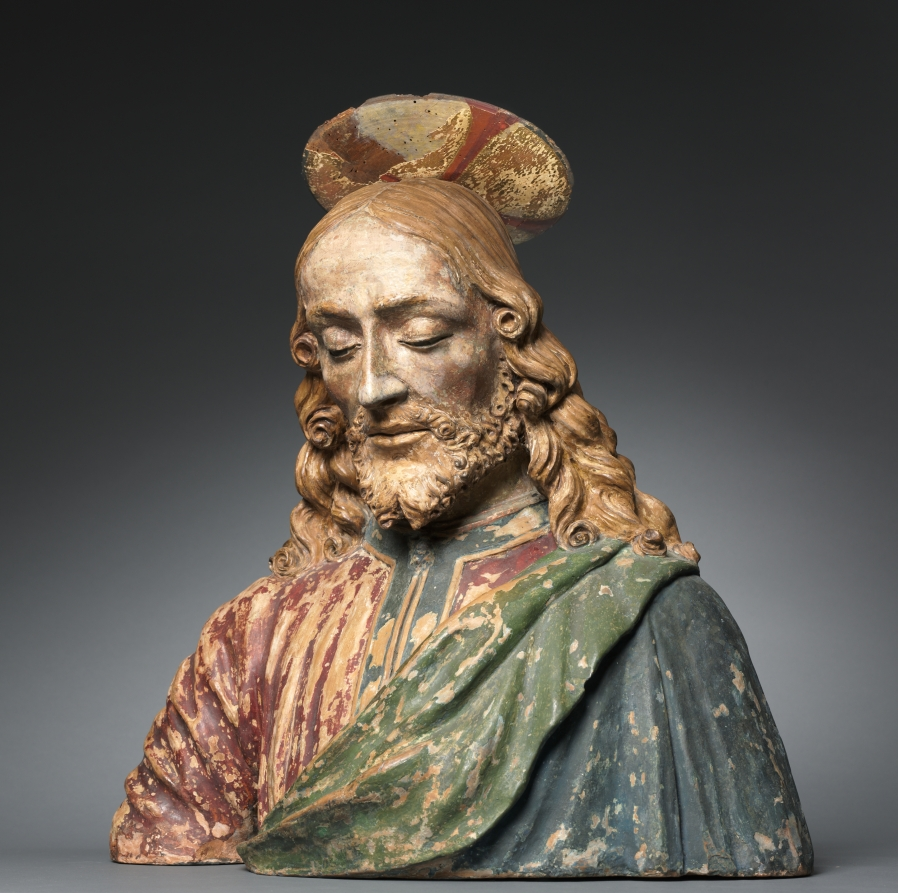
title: Bust of Christ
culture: Italy, Florence, 15th century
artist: workshop of Andrea del Verrocchio (Italian, 1435–1488)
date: c. 1470–1500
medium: painted terracotta and wood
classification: Sculpture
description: In the late 1400s Andrea del Verrochio set up a large workshop where he and his assistants reproduced copies of his sculpture and other works for a middle-class market. Originality was not the objective; in fact, most people were only interested in purchasing replicas of well-known works. This sculpture was modeled after Verrocchio's Christ figure in the bronze sculpture group Christ and St. Thomas at Orsanmichele in Florence, Italy. The medium of terracotta, which was cheaper than bronze or marble, made it possible to offer copies at a reasonable price. Additionally, workshop practices reduced the cost of the work by reducing labor time. Assistants were usually responsible for the shaping of the torso and garments, while Verrocchio was often in charge of executing the facial features and hair. In this sculpture the torso is out of proportion, and the general discrepancy in quality between the parts of the sculpture is due to the fact that it is a workshop production. Given that the facial features are so well executed and the statue retains a stirring motional quality, a trademark of Verrocchio's style which artists found hard to duplicate, it is probable that this sculpture was made in Verrocchio's studio, possibly even with active involvement by the artist on the head.